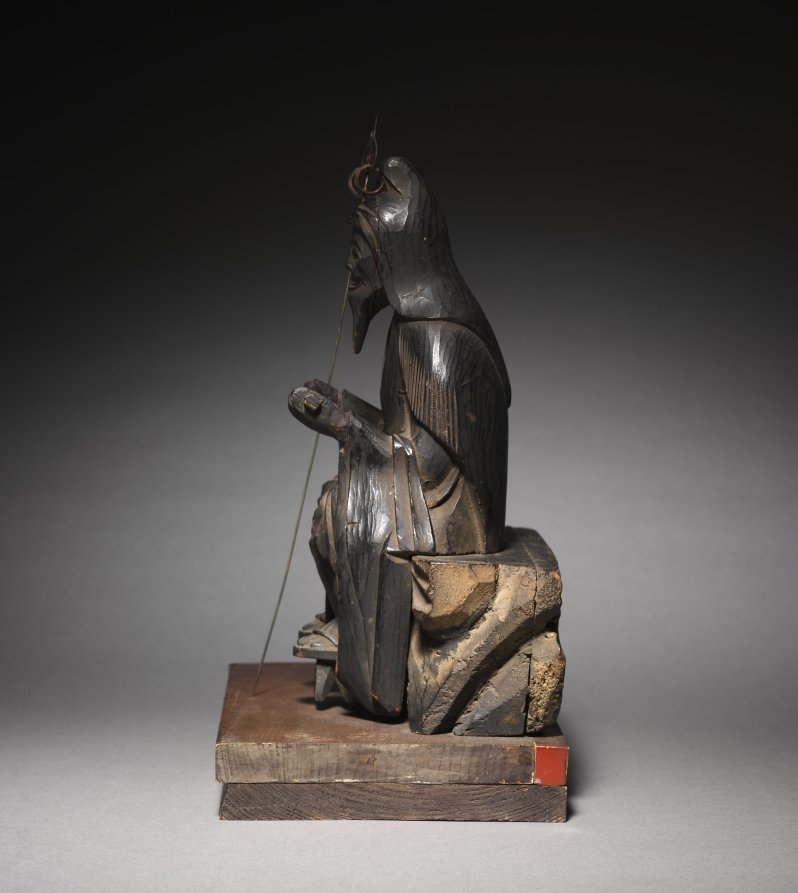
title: En no Gyōja with Zenki and Kōki (En no Gyōja)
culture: Japan, Edo period (1615–1868)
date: 1615–1868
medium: wood with paint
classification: Sculpture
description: This is one of a trio of figures identified as Enno Gyoja and his two attendants, Zenki and Kōki. The set follows the iconography of Shugendo, the traditional mountain ascetic practice in Japan. Enno Gyoja is depicted as a hermit-monk, seated on a rock attached to a modern base. He holds a staff in his right hand and a sutra in the left. The two attendants take the form of half-human, half-demonic figures and are regarded as a married couple.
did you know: These figures' miniaturized format allowed them to be portable devotional statuettes that worshipers could carry as they traveled.